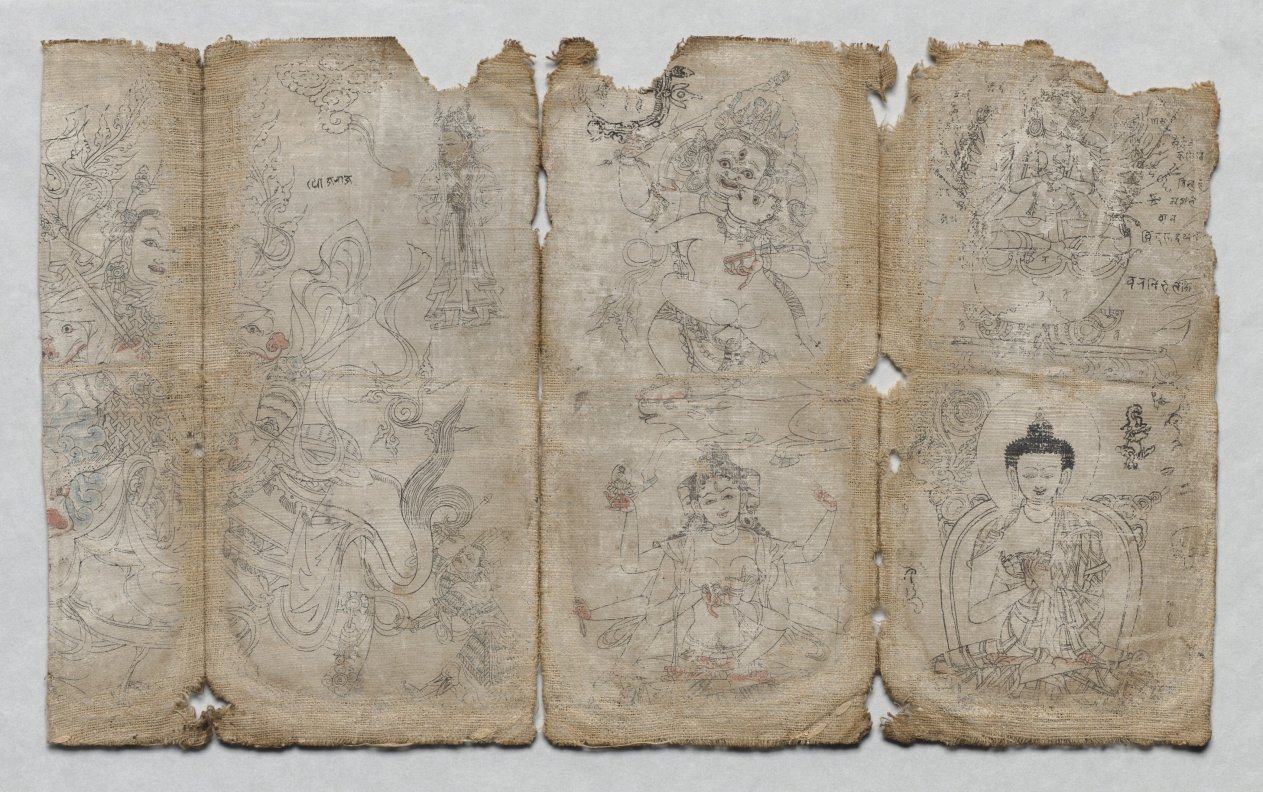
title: Iconographic Drawings: Vaishravana, Yama, Ushnishavijaya, Chunda (?), and Buddha (recto)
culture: Tibet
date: c. 1500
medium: ink and watercolor on cotton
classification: Drawing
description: Tibetan thangka painters referred to sketchbooks with drawings that delineate the iconographies—appearance and identifying attributes—of Buddhist figures. These visual guides were heavily used; very few survive. This rare example shows signs of wear, but the steady line drawings are the work of a master. The largest figure on the left is the guardian king of the north, Vaishravana, god of wealth, and the small figure to the right appears to be a donor in Tibetan dress. The next page to the right has Yama, the guardian king of the south, and the god of death in union with his consort on his buffalo mount. Below them is a goddess of longevity, Ushnishavijaya. At the far right is an 18-armed goddess seated in a skull cup on serpents, below which is a seated Buddha.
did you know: The script notations are in an Indic script, but the line drawings are Tibetan.